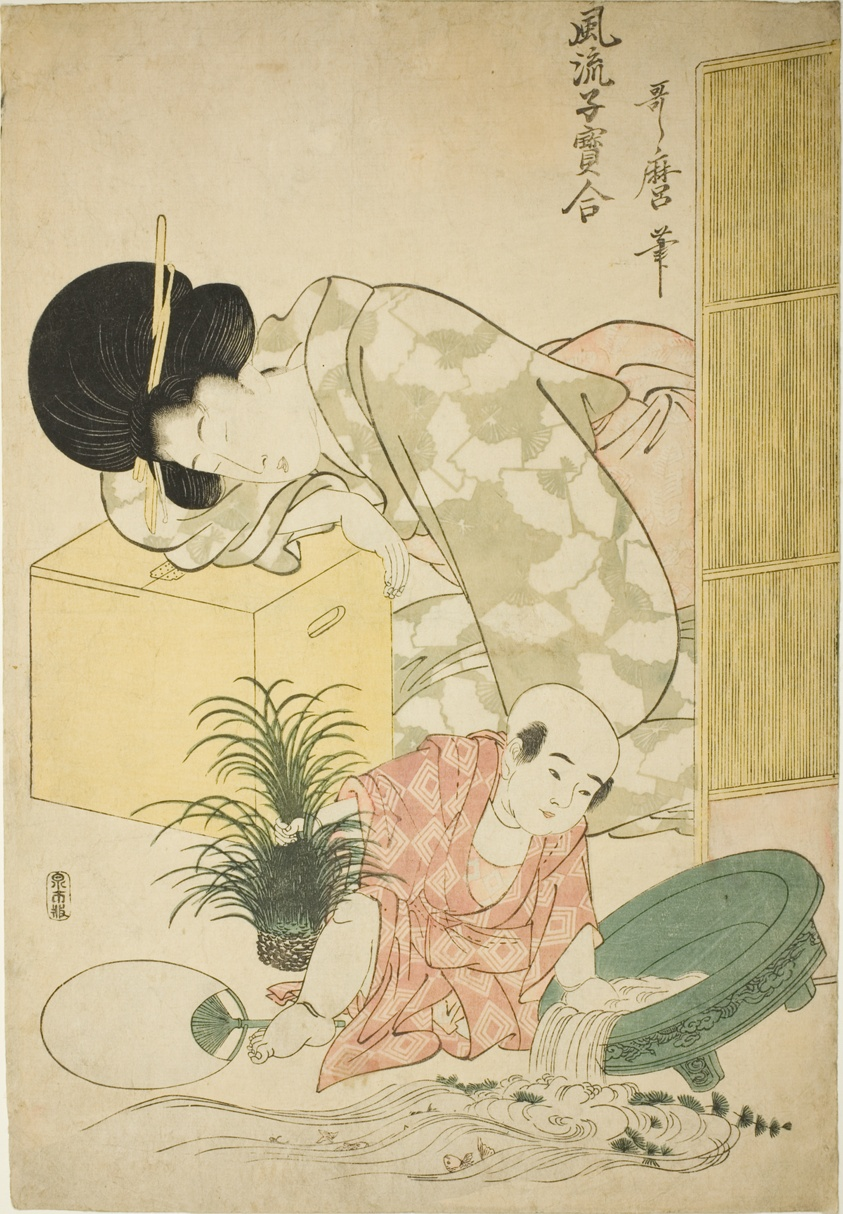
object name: Print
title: Goldfish, from the series "Elegant Comparison of Little Treasures (Furyu kodakara awase)"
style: Japanese (culture or style)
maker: Kitagawa Utamaro 喜多川 歌麿; Japanese, 1753 (?)-1806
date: c. 1802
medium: Color woodblock print; oban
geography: Japan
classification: woodblock print; print; asian art